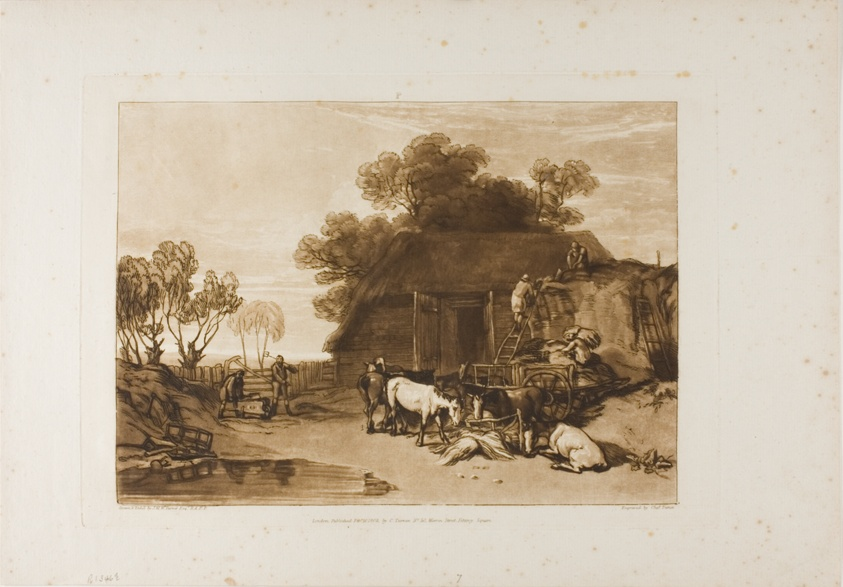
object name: Print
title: The Straw Yard, plate 7 from Liber Studiorum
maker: Joseph Mallord William Turner (English, 1775-1851); Engraved by Charles Turner (English, 1773-1857)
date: published February 20, 1808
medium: Etching and engraving in brown on ivory laid paper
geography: England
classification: etching; print; prints and drawing